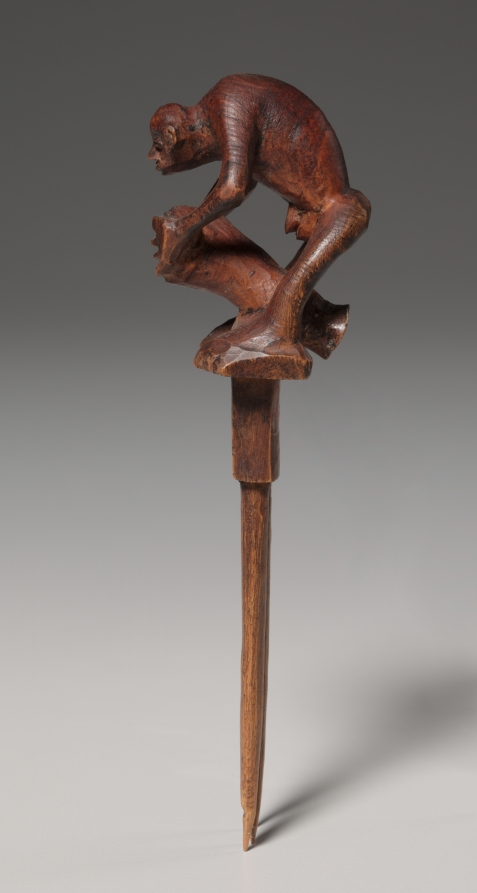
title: Comb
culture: Central Africa, Democratic Republic of the Congo or Angola, Chokwe, 20th century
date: c. 1910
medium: Wood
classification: Tool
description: Several combs demonstrate a diversity of form and treatment. One (1976.180), a vigorously carved work showing a powerful drummer in performance, is an excellent example of Chokwe artistry meant for female patrons.